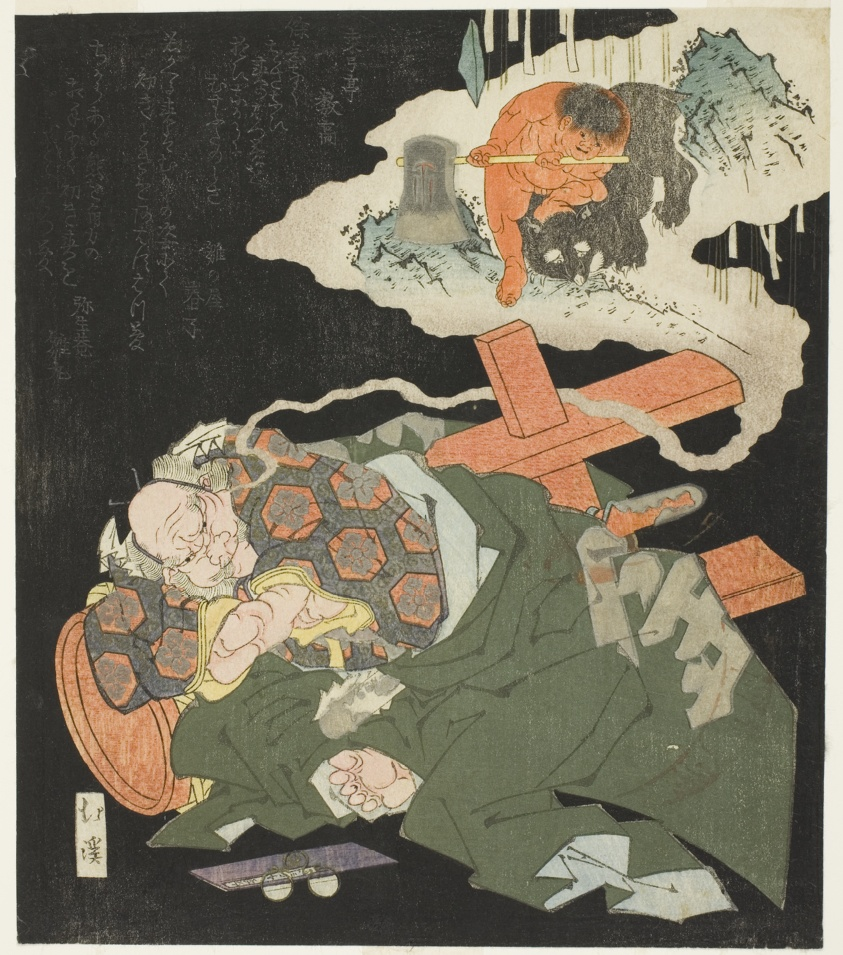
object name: Print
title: Kintaro dreaming of his childhood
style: Japanese (culture or style)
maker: Totoya Hokkei (Japanese, 1780-1850)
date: 1829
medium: Color woodblock print; shikishiban, surimono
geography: Japan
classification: woodblock print; print; asian art